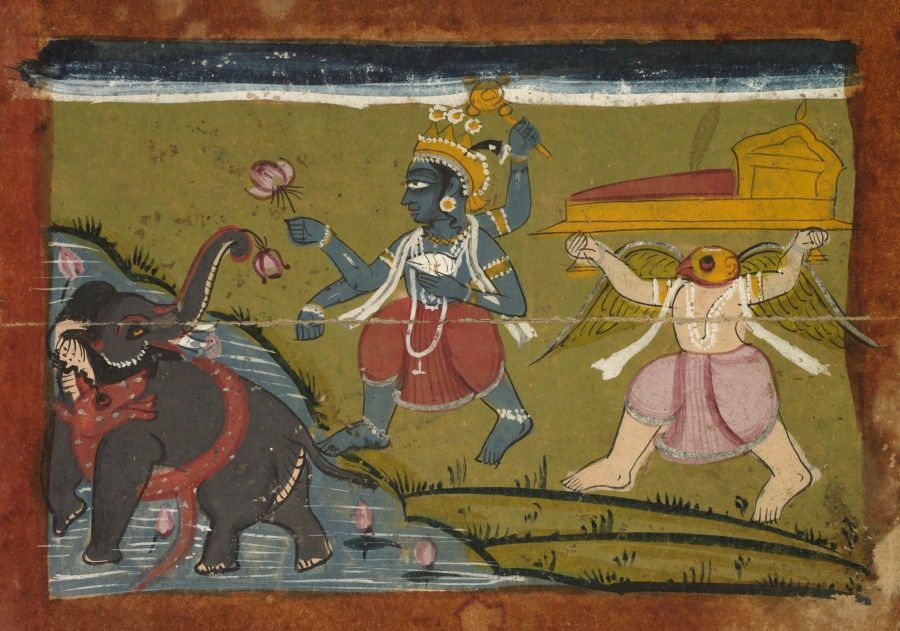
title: Gajendra Moksha: The Salvation of the King of the Elephants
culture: India, Rajasthan, Kota(?), 19th century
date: 1800s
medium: color on paper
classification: Painting